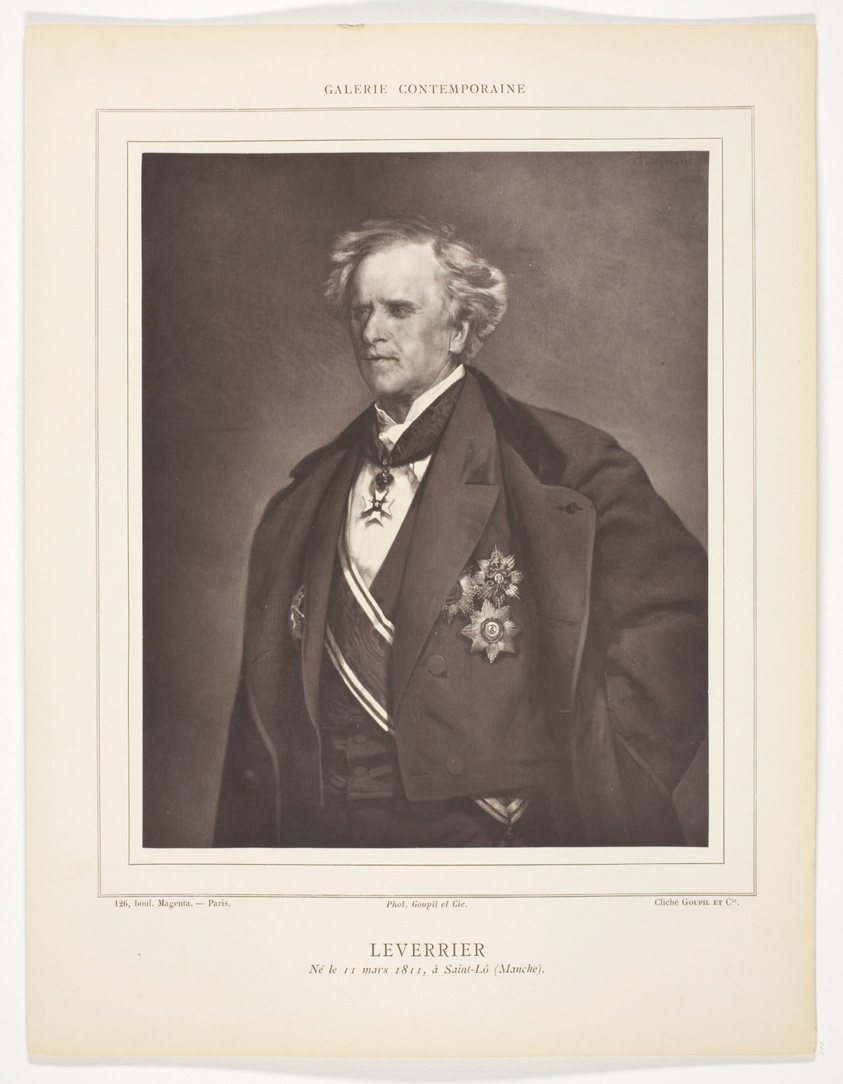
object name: Photograph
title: Leverrier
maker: Goupil et Cie; French, active after 1855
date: 1975/79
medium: Woodburytype, from the periodical “Galerie Contemporaine Littéraire, Artistique” (1879), volume 7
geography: France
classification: woodburytype; photomechanical process; photography; photograph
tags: Collected by Hugh Edwards, Contemporaine Littéraire